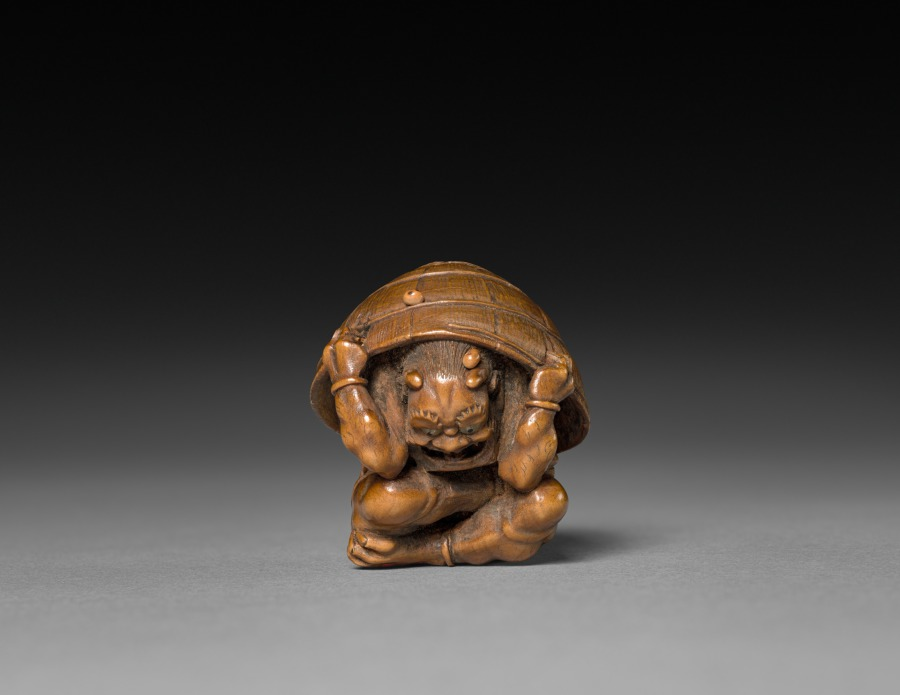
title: Demon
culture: Japan, Edo period (1615–1868)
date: 1615–1868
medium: wood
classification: Netsuke